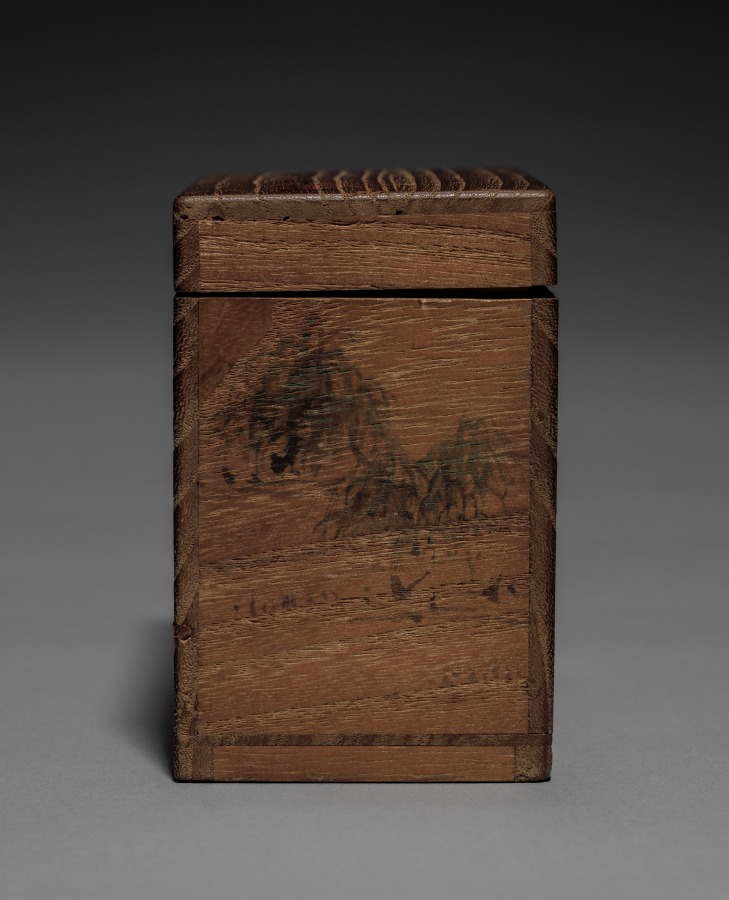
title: Pair of Tea Containers with Plum Blossoms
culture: Japan, Edo period (1615–1868)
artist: Aoki Mokubei (Japanese, 1767–1833)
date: early 1800s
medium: porcelain with underglaze blue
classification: Ceramic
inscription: signed "Ro Mokubei" on base in underglaze blue.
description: Aoki Mokubei, born into a family of restaurateurs, was a potter, calligrapher, painter, and scholar, and is considered one of the three masters of later Edo period Kyoto ceramics. He specialized in porcelains fashioned after Chinese prototypes, and created works for steeped tea (sencha) such as these matching tea caddies decorated in an underglaze blue called sometsuke—literally “with applied dye.” He signed them on their bottoms. They also have intricately patterned silk sleeves to both beautify and protect them. On the exterior of the lid of the outer wooden box that contains them, it is written that Mokubei inscribed and painted an image on the box. On the interior of the lid, the signature and seals of a former owner are written. Mokubei has signed the lid of the inner box, and a charming ink and light color composition of West Lake in Hangzhou in China covers its three sides. On the fourth side is a long inscription by Mokubei describing the scene.